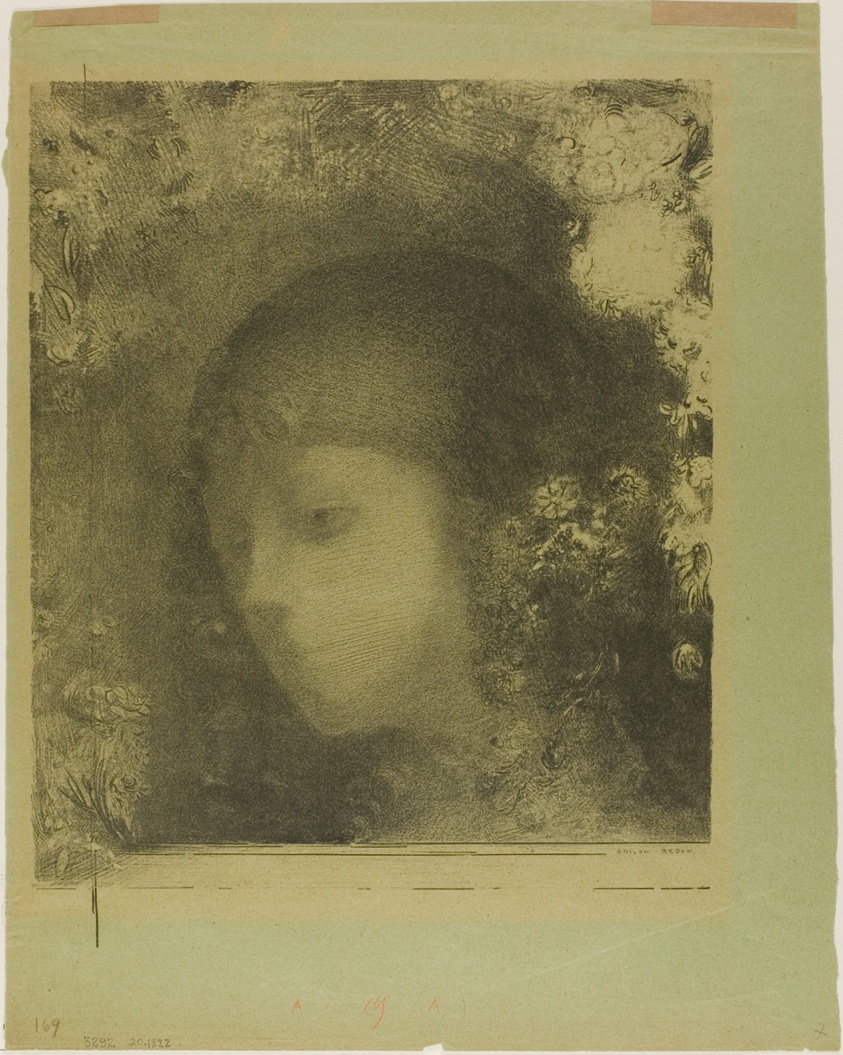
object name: Print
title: Child's Head With Flowers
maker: Odilon Redon (French, 1840-1916)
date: 1897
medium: Lithograph in black on green wove paper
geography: France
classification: lithograph; print; prints and drawing; paper